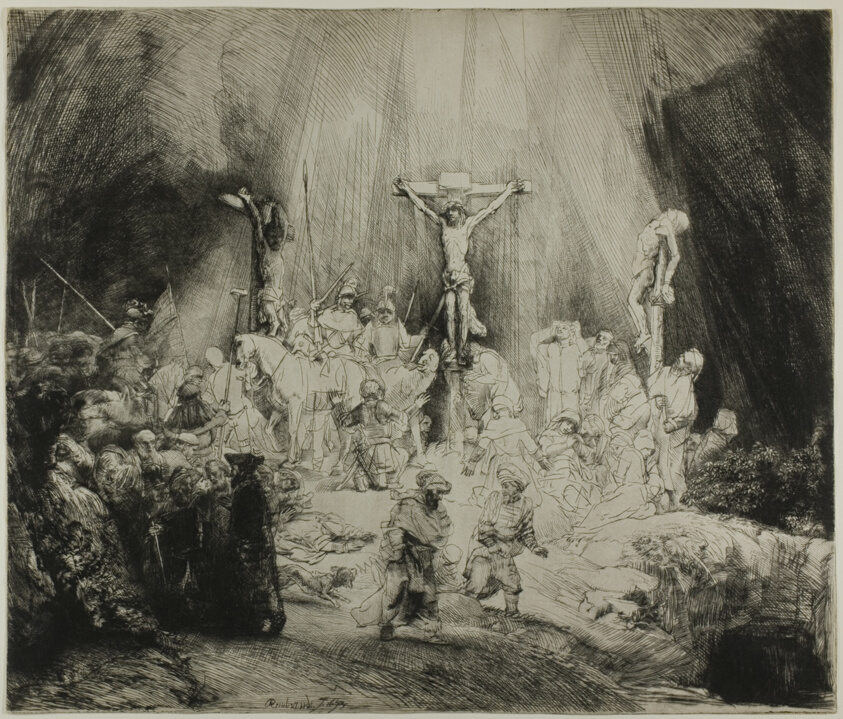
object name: Print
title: Christ Crucified between the Two Thieves: "The Three Crosses"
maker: Rembrandt van Rijn (Dutch, 1606-1669)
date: 1653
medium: Drypoint and burin on ivory laid paper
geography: Holland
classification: drypoint; print; prints and drawing; paper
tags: religious scenes